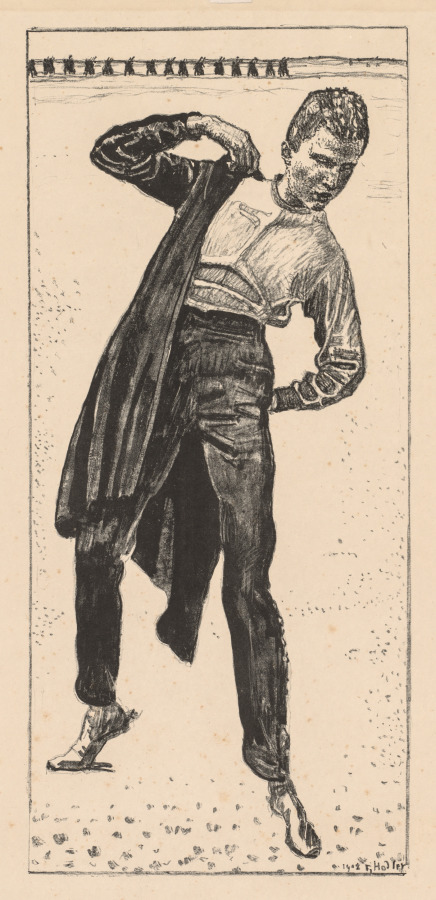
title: Student Putting on His Coat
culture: Switzerland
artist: Ferdinand Hodler (Swiss, 1853–1918)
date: 1908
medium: lithograph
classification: Print